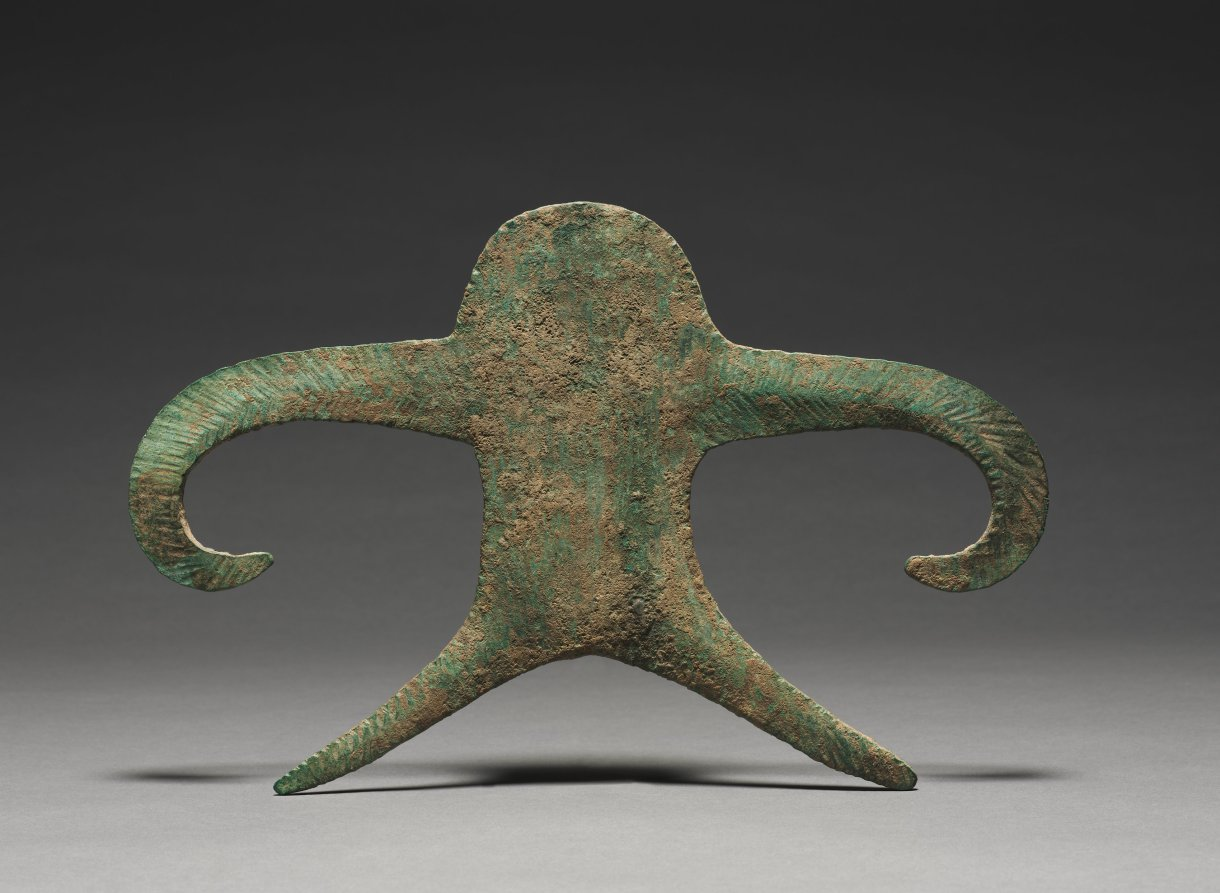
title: Anthropomorph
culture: India, Bronze Age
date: c. 1500–1000 BCE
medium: copper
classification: Sculpture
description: Among the few works of art known from the first millennium BC in India, anthropomorphs such as this fine example have an abstract formal appeal, but their meaning and function remain mysterious. They were made during the approximately 1,500-year long period of time between the protohistoric Indus Valley civilization, which flourished between about 2,800–1,800 BC, and the Maurya period (322–187 BC), when works of art must have been made in perishable materials that no longer survive.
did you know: Most of these mysterious objects were discovered in the plain regions of the Ganges and Yamuna Rivers of northern India.